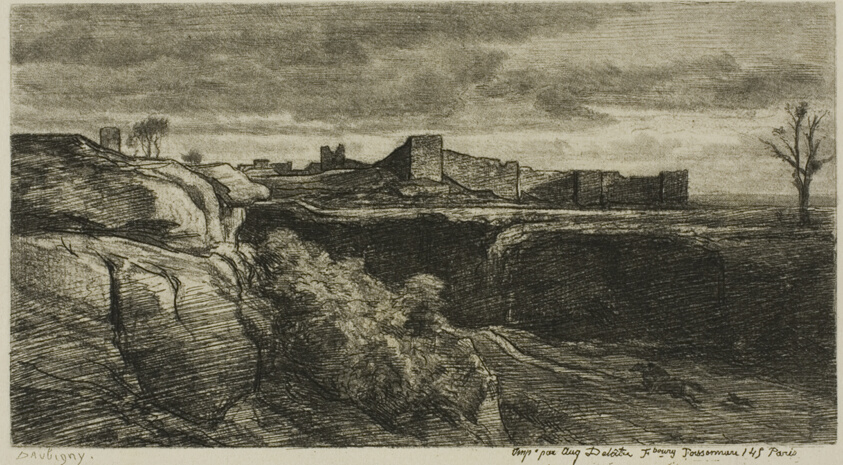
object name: Print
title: Ruins of the Château of Crémieux (Isère)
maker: Charles François Daubigny (French, 1817-1878)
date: 1850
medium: Etching, roulette and aquatint on cream Japanese paper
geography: France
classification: etching; print; prints and drawing